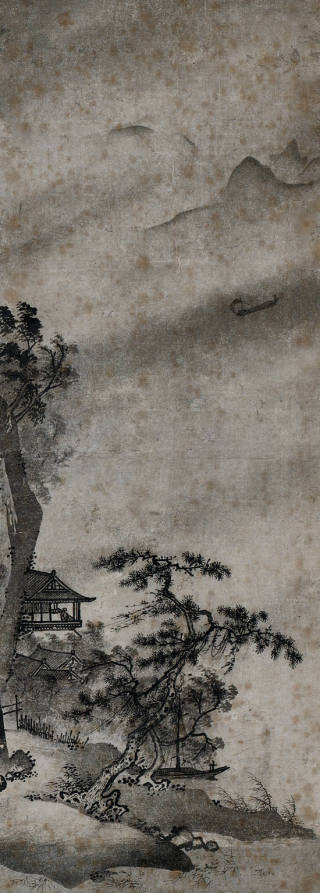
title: Windy Landscape with Sailboat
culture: Japan, Muromachi period (1392–1573)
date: mid-1400s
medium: hanging scroll; ink on paper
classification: Painting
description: Windy Landscape depicts the humble waterside retreat of an official retired from government service. For government officials, retreating from the city to a remote locale was the ideal retirement, though difficult to attain. In this scroll the retiree gazes out over the watery expanse past the sailboat to the mist-covered mountain in the far distance. The artist has achieved this depth of composition through carefully placed brushstrokes and ink washes.